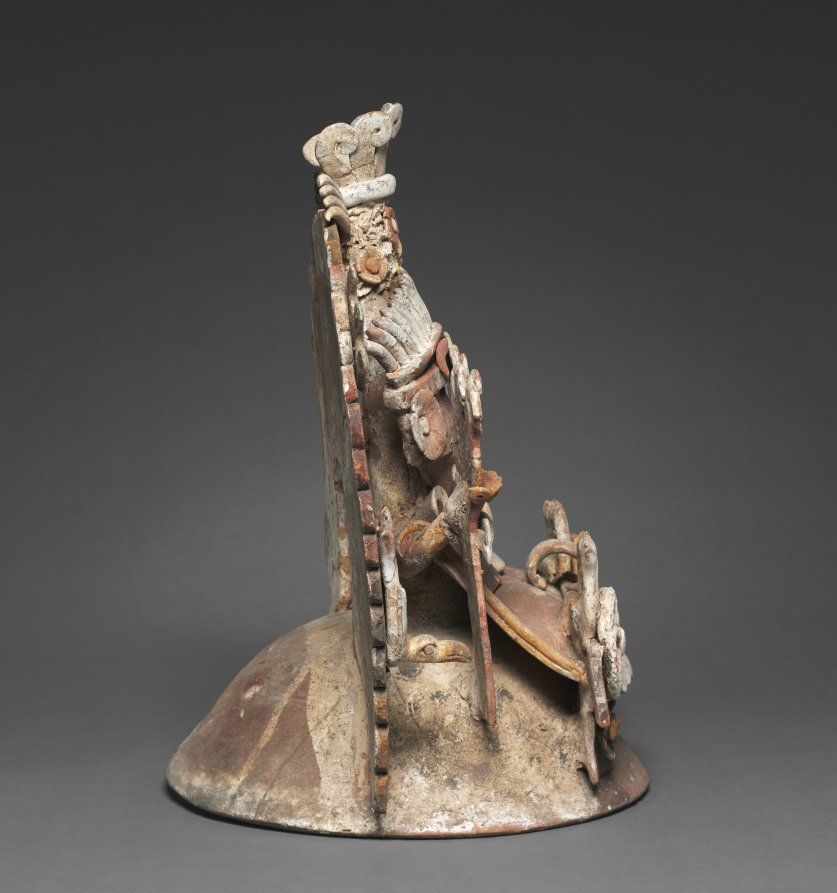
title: Incense-burner Cover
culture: Guatemala, Escuintla Region, early 6th Century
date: c. 500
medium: earthenware with slip and pigments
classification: Ceramic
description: This elaborate clay construction served as the cover and chimney of a basin used to burn copal incense. Although probably manufactured in what is now Guatemala, the form and fabrication are based on examples from Teotihuacan in central Mexico, hundreds of miles away. Intensive trade between the two regions, or even a Teotihuacan colony in Guatemala seems likely. The masked, dressed, and ornamented moundlike form probably represents a mortuary bundle or a cult image.